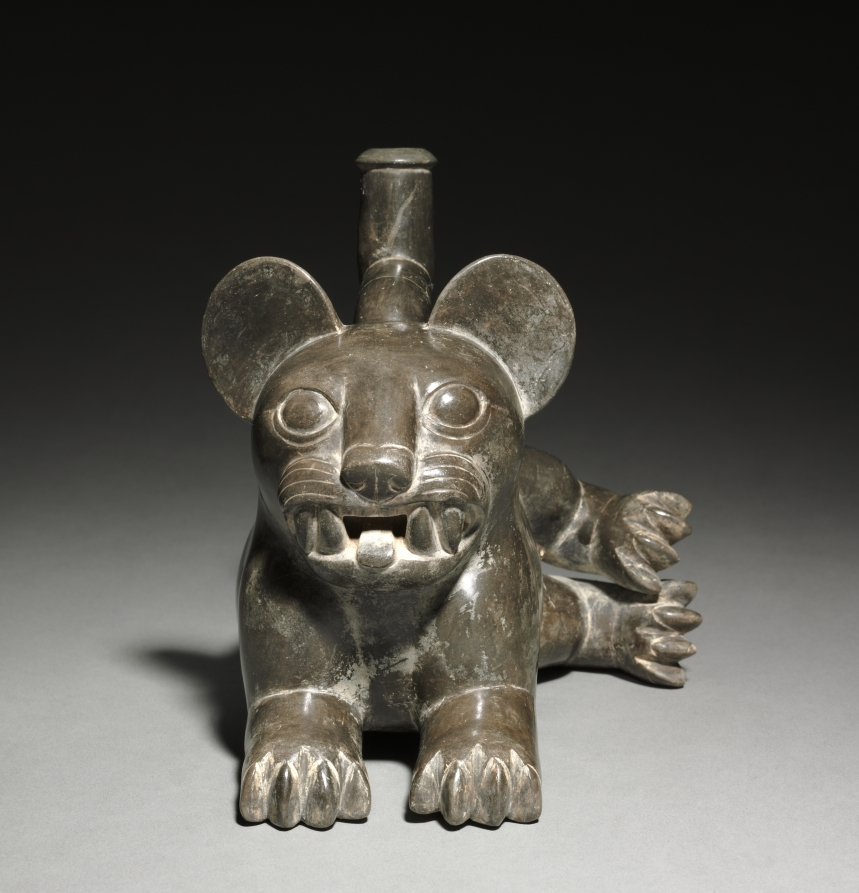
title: Feline Vessel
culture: Central Andes, North Coast, Moche people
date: 200–850 CE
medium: ceramic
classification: Ceramic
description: This darkware vessel is early Moche and demonstrates the transition from earlier North Coast cultures, which used smudge firing and post-fire pigmentation, to Moche times, which saw the adoption of new, higher-oxygen firing technologies and the use of slips applied before firing.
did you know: The Moche were known for their fine animal representations.